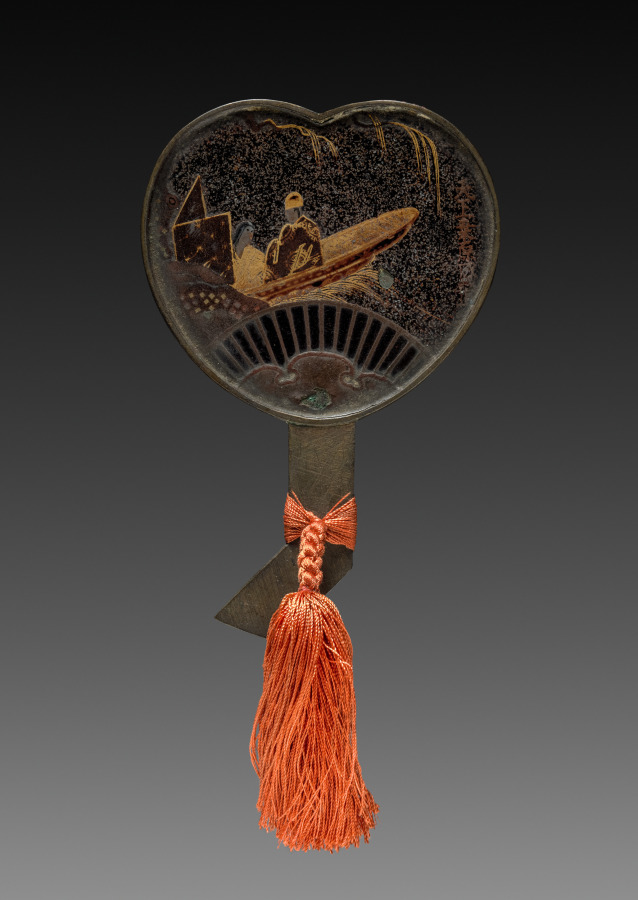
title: Mirror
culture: Japan, Edo period (1615–1868)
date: 1615–1868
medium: bronze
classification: Metalwork